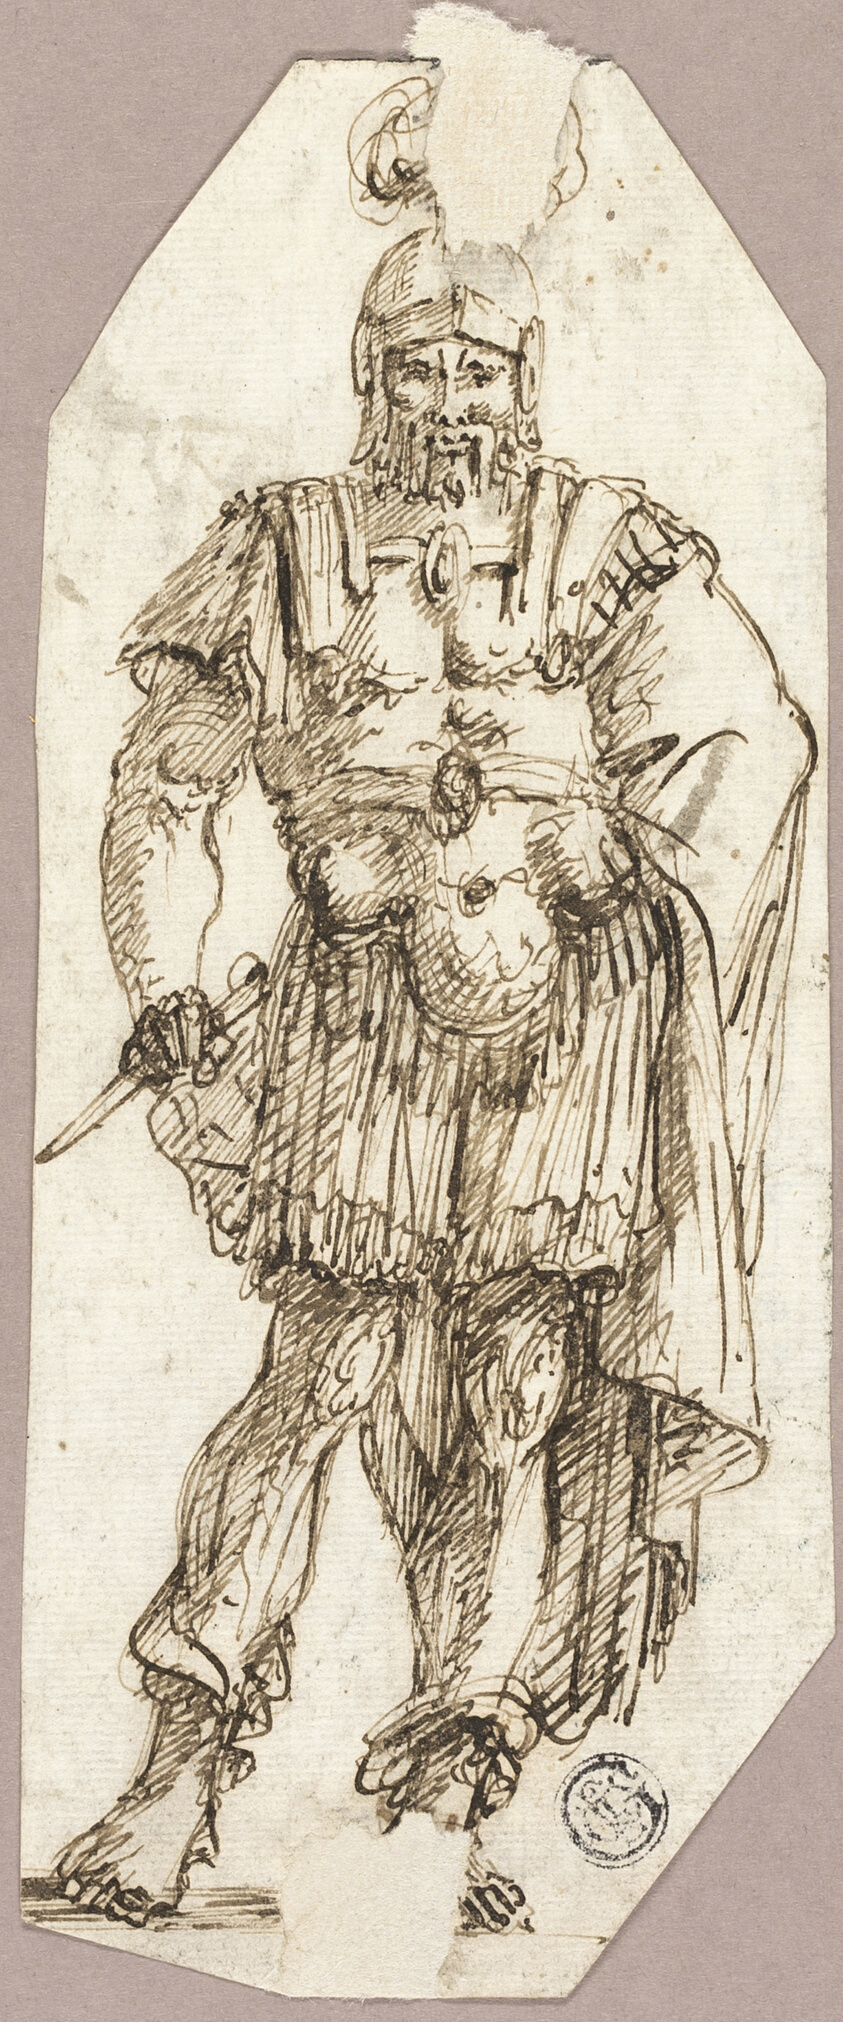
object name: Drawing and Watercolor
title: Standing Warrior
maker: Style of Nicolas Poussin (French, 1594-1665); or Stefano della Bella (Italian, 1610-1664)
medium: Pen and brown ink on ivory laid paper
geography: Italy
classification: drawings (visual works); paper; pen and ink drawings; prints and drawing